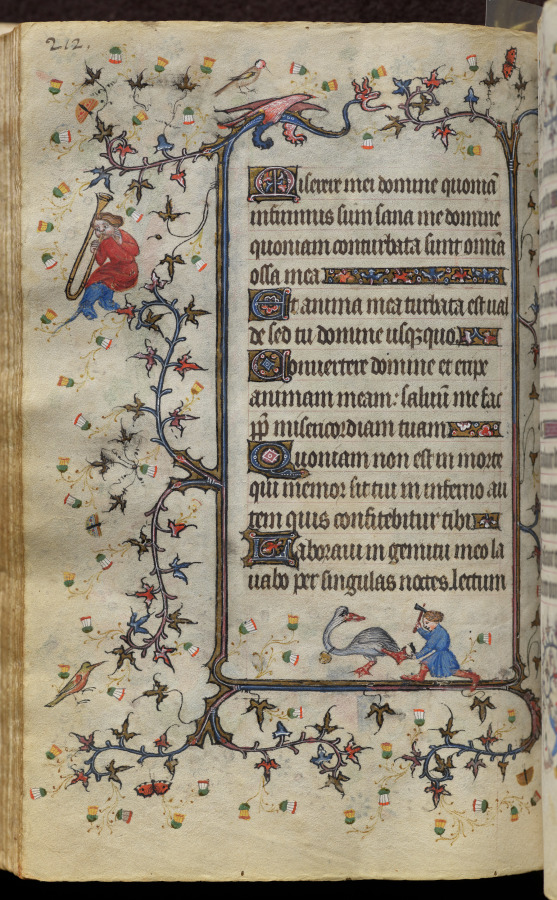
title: Hours of Charles the Noble, King of Navarre (1361-1425): fol. 106v, Text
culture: France, Paris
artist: Master of the Brussels Initials and Associates (French)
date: c. 1405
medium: ink, tempera, and gold on vellum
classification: Bound Volume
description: This precious volume was obviously highly prized by its owner, the French-born King of Navarre, who had his coat of arms painted on no less than twenty folios. Rather than directly commissioning this manuscript from a specific workshop, it seems that Charles the Noble acquired his book of hours -- perhaps ready-made for the luxury market -- while on a trip to Paris in 1404-05. A collaborative effort, six painting styles are evidenced within the pages of this codex, those of two Italians, two Frenchmen, and two Netherlanders. The painter who was responsible for the planning and decoration of the book, and who produced seventeen of the large miniatures, was a Bolognese artist known as the Master of the Brussels Initials. His principal assistant, responsible for most of the borders, was a Florentine who signed his name "Zecho" da Firenze on folio 208 verso.